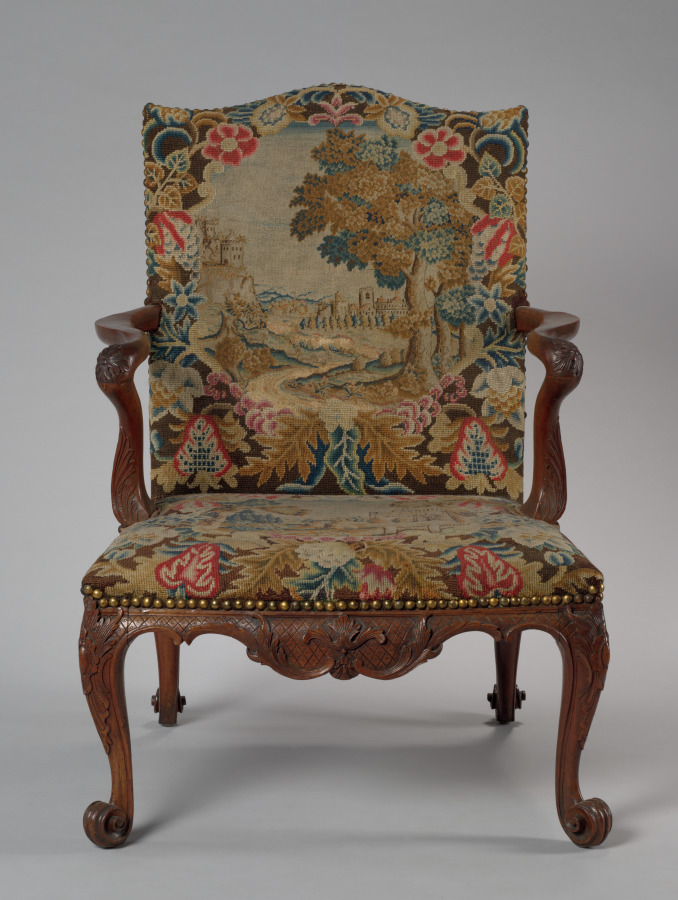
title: Armchair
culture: England, 18th century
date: 1760–1765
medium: mahogany upholstered in needlework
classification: Furniture and woodwork